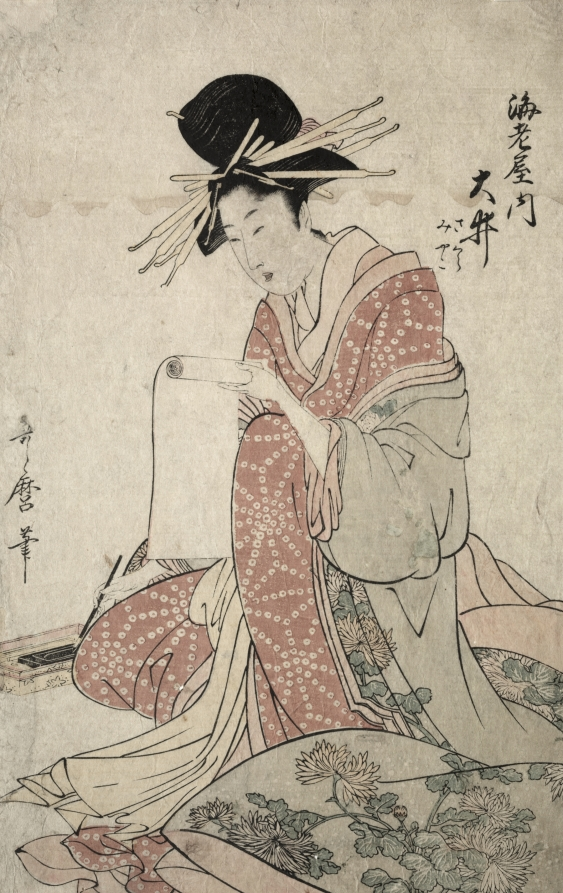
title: Woman of the Yoshiwara Reading Scroll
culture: Japan, Edo period (1615–1868)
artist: after Kitagawa Utamaro (Japanese, c. 1754–1806)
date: 1753–1806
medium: color woodblock print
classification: Print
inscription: Signature: Utamaro fude